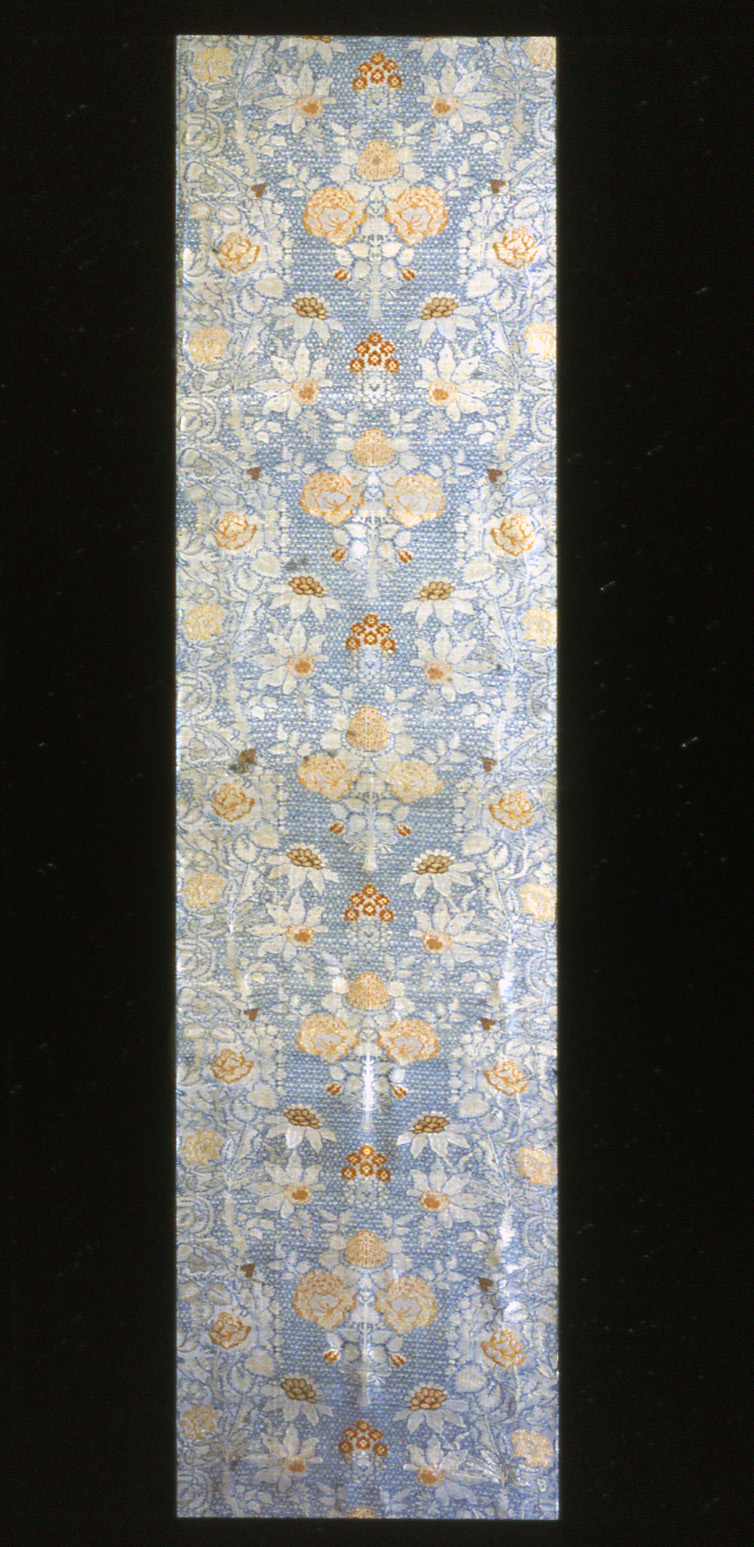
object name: Textile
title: Panel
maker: France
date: 1730/32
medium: Silk, plain weave of two-color complementary ground wefts with supplementary brocading wefts and self-patterned by areas of twill interlacing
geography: France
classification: textile; weaving